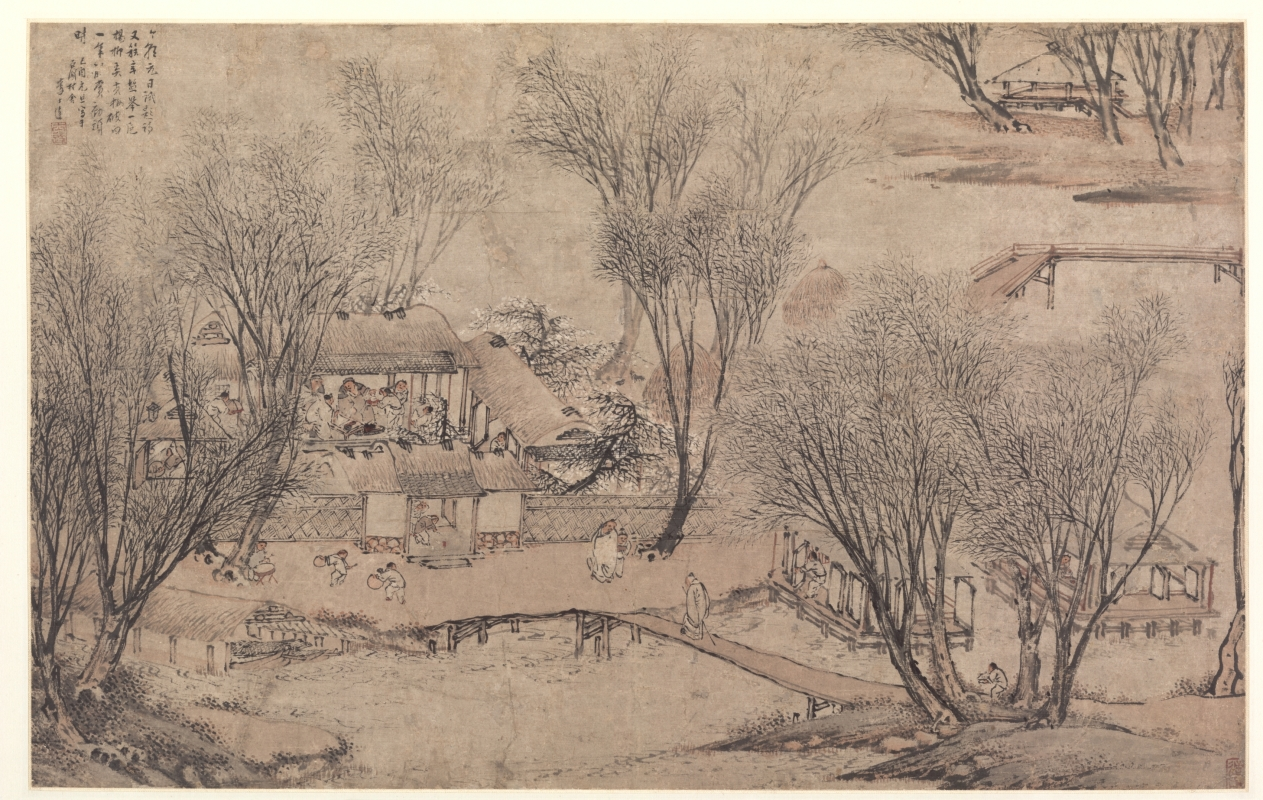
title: New Year's Day in a Village at Stone Lake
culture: China, Ming dynasty (1368–1644)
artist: Li Shida (Chinese, c. 1549–c. 1621)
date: 1609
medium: Album leaf; ink and light color on paper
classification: Painting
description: This rural scene presents typical activities of a New Year’s Day in which relatives and friends approach the house to convey their good wishes to the elders. Two boys in the courtyard light fire crackers, and servants in front of the main gate beat the gong to announce the guests. Inside the house, the hosts entertain their guests by offering hot wine and by writing New Year couplets to be hung on the gates welcoming the New Year. White cherry blossoms announce the spring. The water village at Stone Lake is characteristic of the Jiangnan region in southeast China. Born in Suzhou, the artist Li Shida may have even had his hometown in mind when he produced this painting.